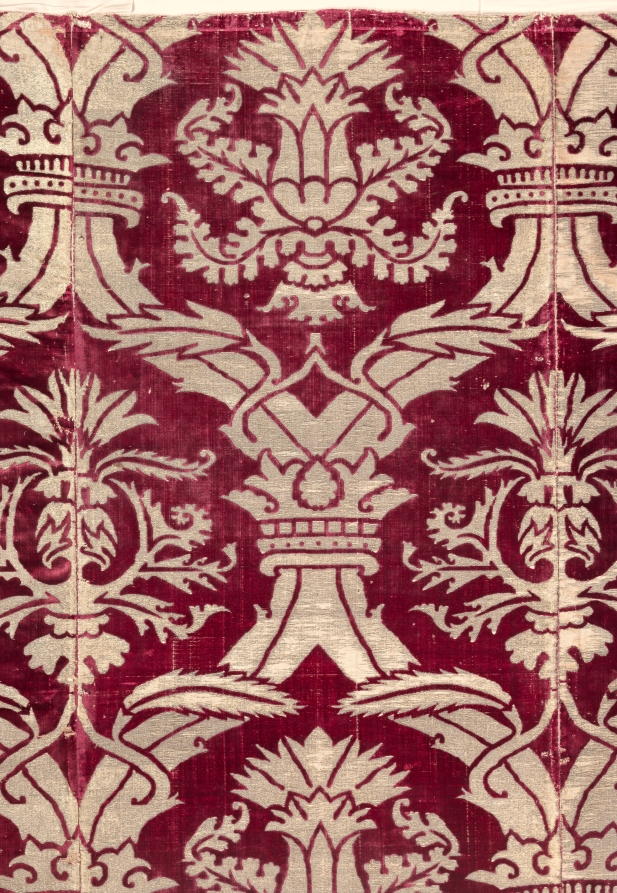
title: Brocaded Velvet Panel with Italianate Pattern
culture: Turkey, Istanbul or Bursa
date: 1575–1625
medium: Silk: velvet, brocaded; gilt-metal thread and cotton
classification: Velvet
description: Rarely are four fabric widths preserved together from any culture. This gilt-metal thread pattern combines Turkish and Italian features: the large ogival (curved) lattice clasped by crowns and the velvet structure are Turkish, and the two so-called artichoke designs are enlarged adaptations of Italian motifs. A symbol of wealth and power, this velvet panel was woven during the artistic height of the Ottoman Empire in the late 1500s. It may have covered a divan (sofa) or possibly enhanced a wall during cold winters in the imperial Topkapi Palace in Istanbul.